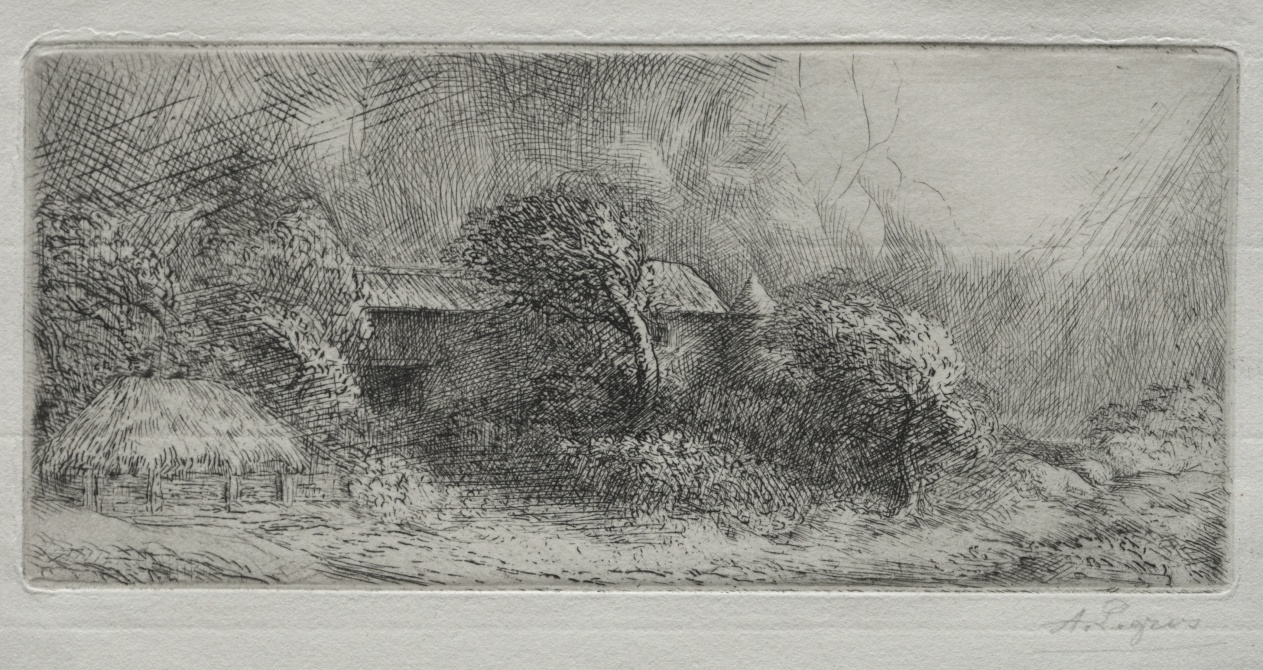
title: Chailli: effet d'orage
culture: France, 19th-20th century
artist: Alphonse Legros (French, 1837–1911)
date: c. 1857–1911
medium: etching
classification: Print